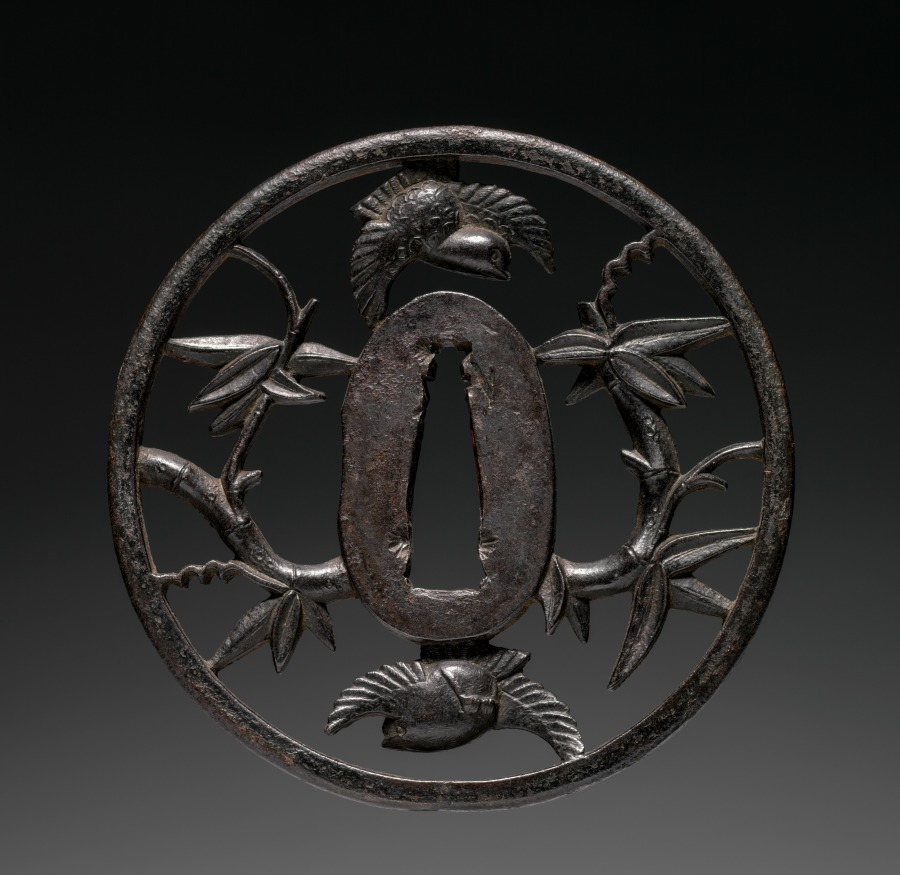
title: Sword Guard (Tsuba) with Birds in Bamboo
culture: Japan, possibly Edo period (1615-1868)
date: c. 1615–1868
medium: iron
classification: Arms and Armor